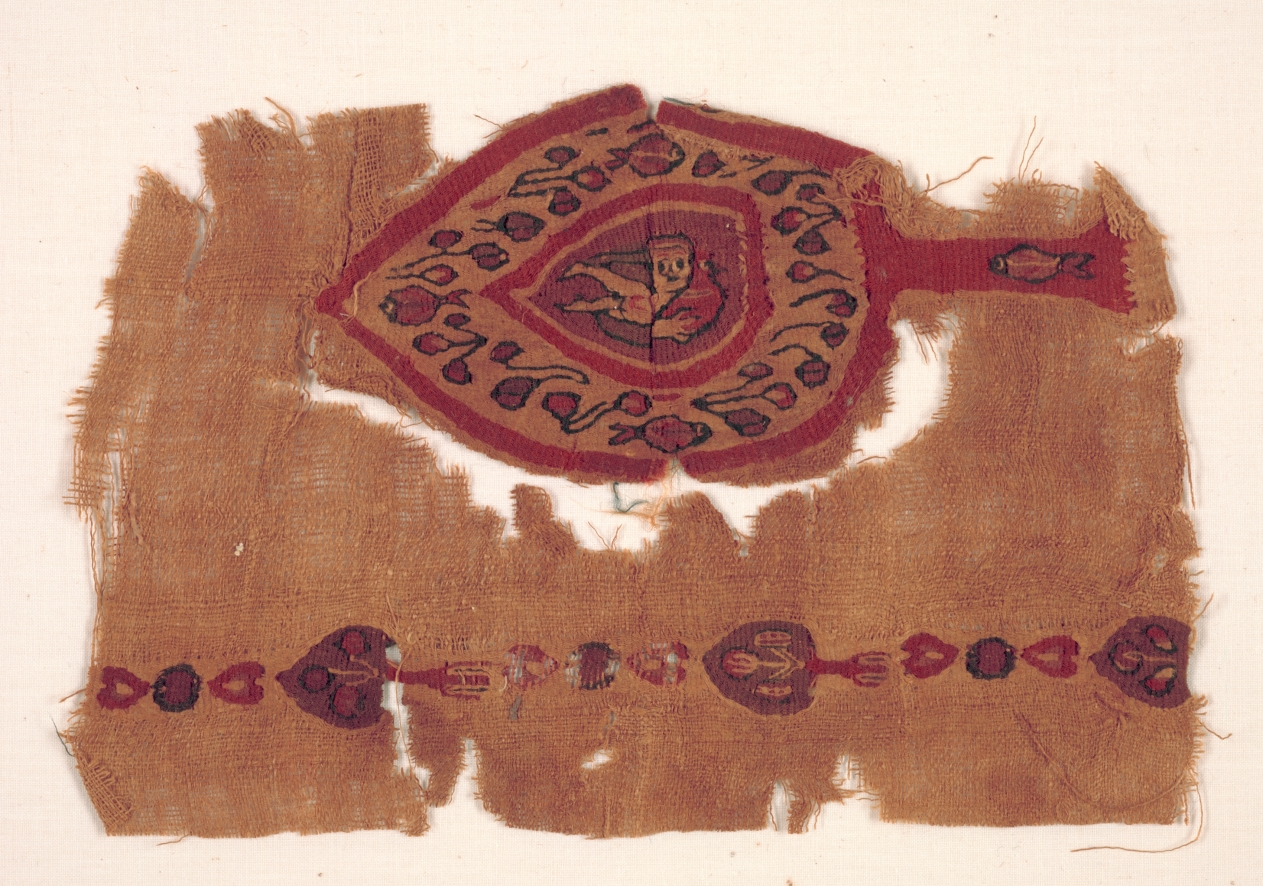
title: Fragment from a Curtain (?)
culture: Egypt, Byzantine period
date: 400s - 500s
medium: tabby weave with inwoven tapestry ornament, linen and wool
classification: Textile